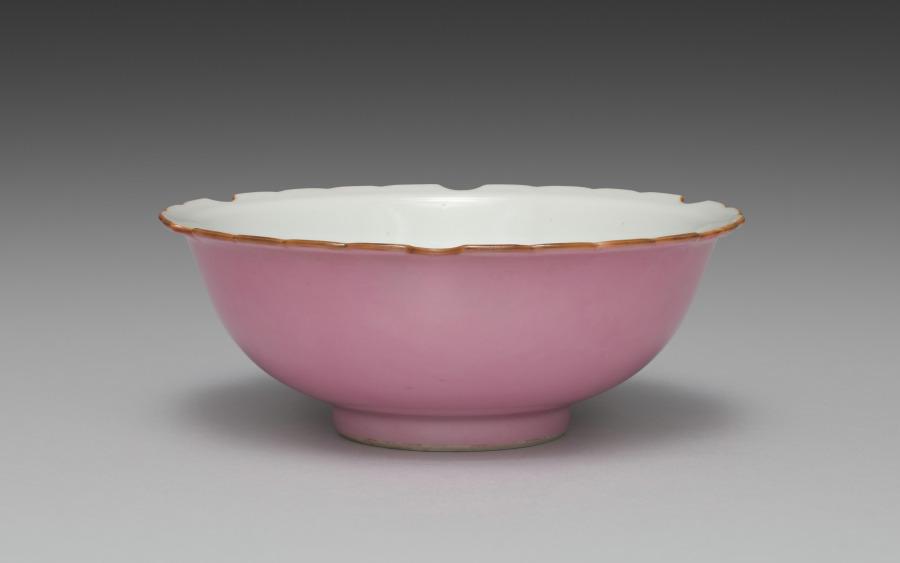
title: Dish from Snow-Flake Side Dishes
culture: Japan, Meiji period (1868–1912)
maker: Seifū Yohei III (Japanese, 1851–1914)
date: 1893–1914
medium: One from a set of six porcelain dishes; porcelain with lobed rims and pink glaze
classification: Ceramic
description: According to the box lid, this set of 6 side dishes, or mukōzuke, are “snow-flower style” (sekkashiki), having mouths shaped like snowflakes. Their mouths, which have 6 lobes and scalloped edges, are traced with brown iron oxide at the rim. The outside of each bowl is glazed with a very bright pink over the basin and foot, and the inside is left white. From directly above, one sees a snowflake-like shape, and from the side, they seem to float above a rosy ground.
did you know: The box for this set of dishes has an inscription on the side noting that they were for a person with the family name Nakamoto.